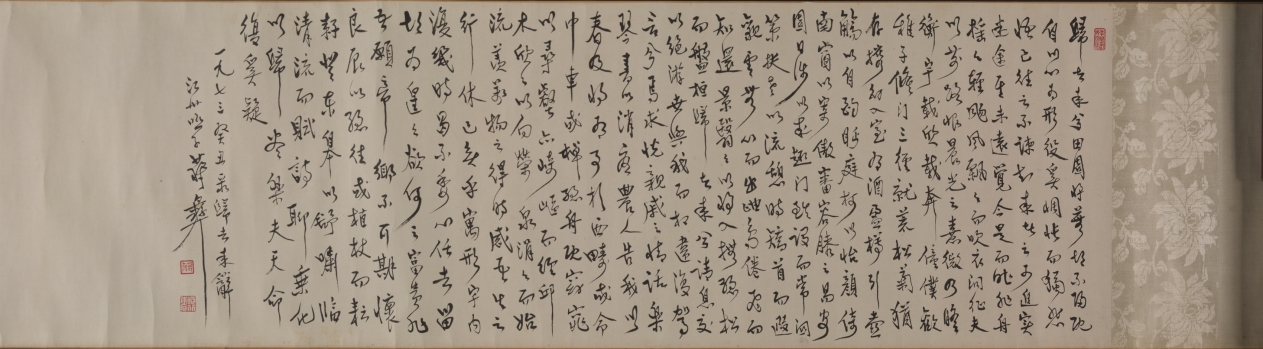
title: Tao Yuanming's Return Home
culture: China, Yuan dynasty (1271-1368)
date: 1300s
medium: Handscroll; ink and slight color on silk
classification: Painting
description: Tao Yuanming's revered poem "Return Home 歸去來辭 (Gui qu lai ci)" powerfully conveys his desire to leave bureaucratic life for the simplicity and authenticity of nature. This sentiment has deeply resonated with generations of Chinese scholars, making it a popular theme in paintings. This handscroll uses continuous narrative depicting Tao in multiple scenes from the poem. Starting on the right, the poet travels to his home. His children wait by the gate, while his wife pauses to tidy her hair before welcoming him. Then, free from the burdens of official service, Tao spends time in both nature and his cottage, where he can again enjoy wine, music, and books.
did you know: Poet Tao Yuanming 陶淵明 (c. 365–427 CE) returned to a secluded life instead of pursuing a civil service career.